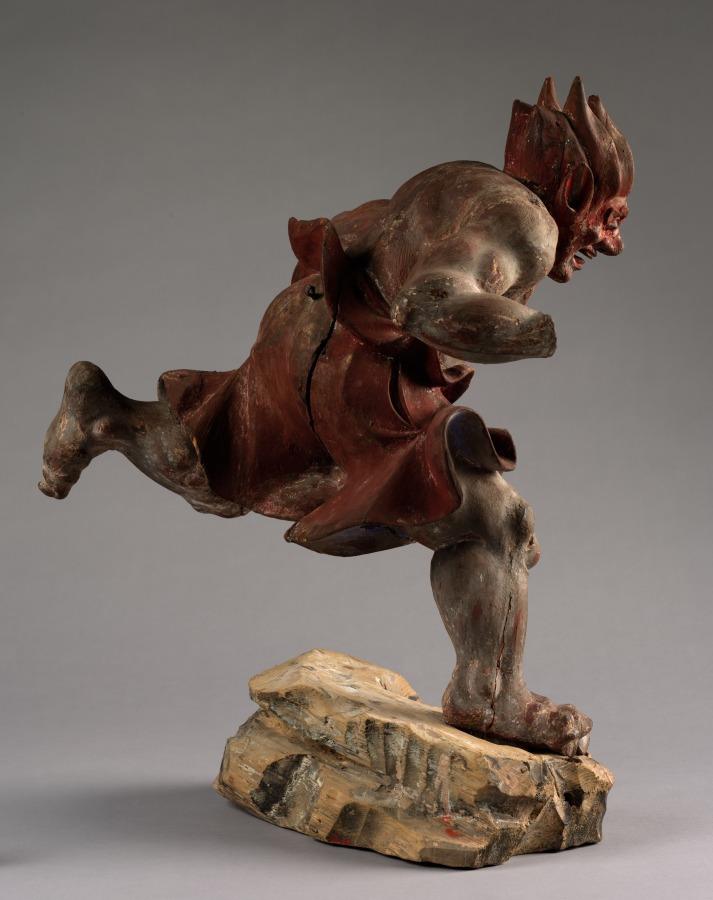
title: Thunder God (Raijin)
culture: Japan, Kamakura period (1185–1333)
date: 1300s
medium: wood with traces of gesso and red and black pigment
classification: Sculpture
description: The Thunder (Raijin) and Wind (Fujin) gods first appeared in early Buddhist art in China and Japan and were based on the popular imagery in India that was derived from the life of the historical Buddha, Shakyamuni. They were shown among a group of demon-monsters flying through the sky above the meditating Shakyamuni in an attempt to frighten away his concentration. Raijin is surrounded by a ring of small drums struck by a stick held in his hand so that he is always accompanied by a thunderous noise. A metal clasp protruding from this sculptures' back indicates that a ring of drums was once attached to the Cleveland Raijin. The matching sculpture, Fujin, is in the Fukuoka Art Museum in Japan.